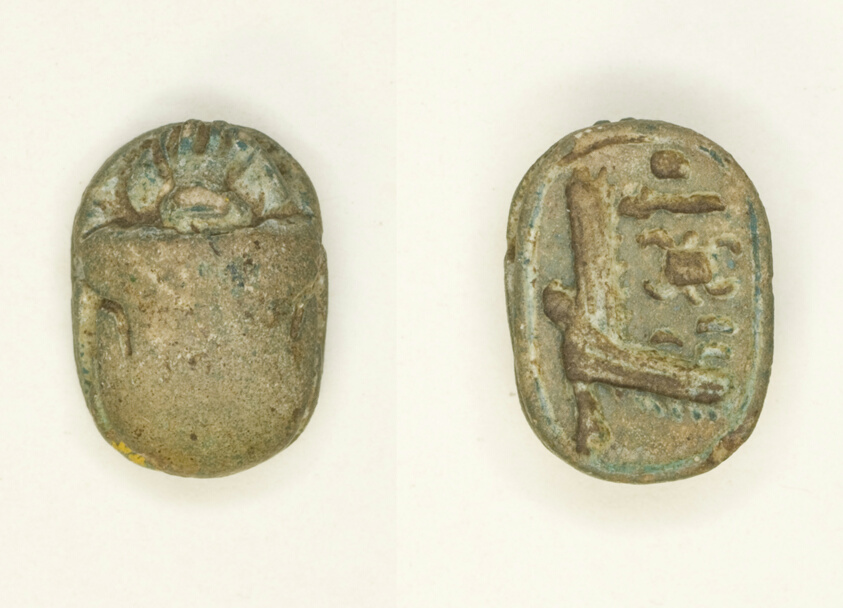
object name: Costume and Accessories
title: Scarab: Aakheperura (Amenhotep II)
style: new kingdom, eighteenth dynasty, ancient, egyptian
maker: Egyptian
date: New Kingdom, Dynasty 18, Reign of Amenhotep II (about 1427–1400 BCE)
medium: Glazed steatite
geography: Egypt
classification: scarab; ancient art; costume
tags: Hieroglyphs, pharaohs, kings, insects, falcons